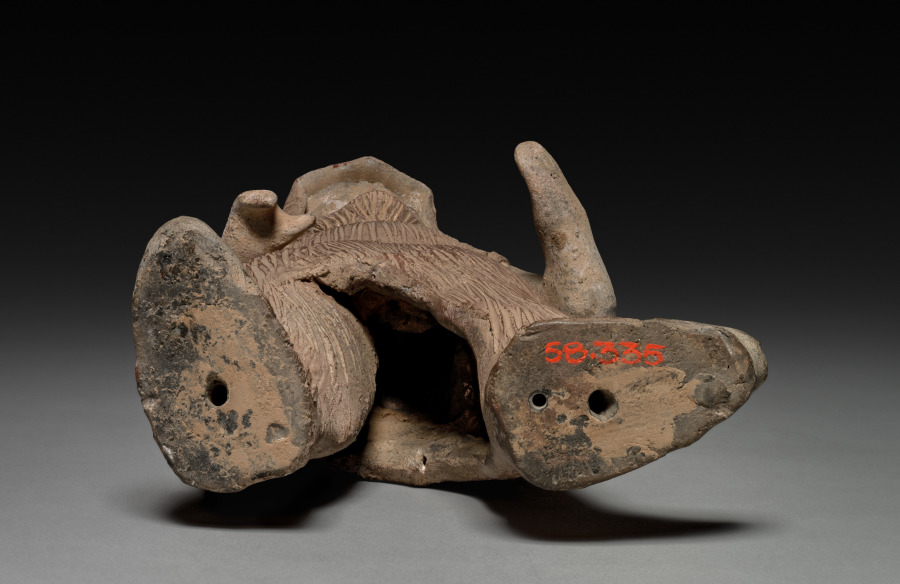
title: Figure of a Warrior in Leather Armor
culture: China, Modern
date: 20th Century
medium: buff earthenware with traces of polychromy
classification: Sculpture